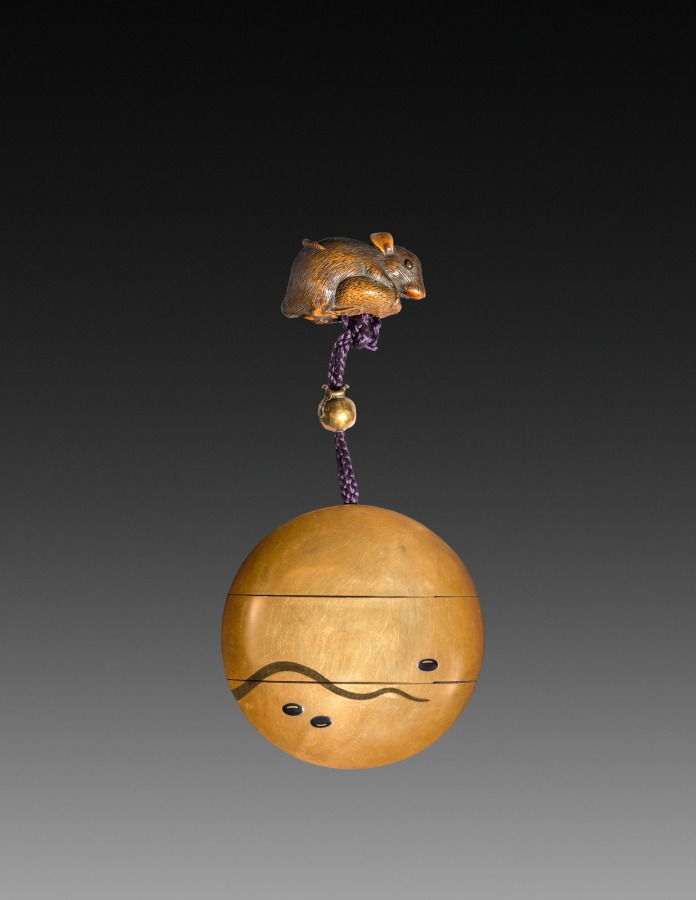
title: Inro (Case) with Mice and Beans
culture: Japan, Meiji period (1868–1912)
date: late 1800s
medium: Lacquer on wood with color and sprinkled gold powder design (maki-e)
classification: Lacquer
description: This round inro is decorated with an image of a single mouse feasting on beans. The theme is elaborated with a metal ojime (cinch) in the form of a cloth bag tied with rope—suggesting the food stores the mouse is raiding. The carved wood netsuke, or toggle, is in the shape of a mouse clutching a nut.